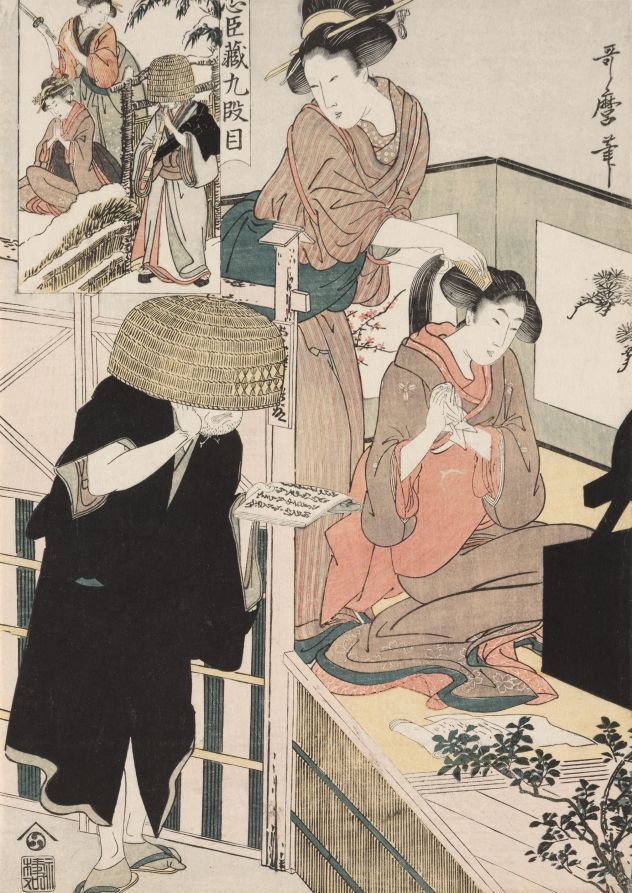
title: Chushingura: Act IX of The Storehouse of Loyalty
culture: Japan, Edo period (1615–1868)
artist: Kitagawa Utamaro (Japanese, c. 1754–1806)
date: late 1790s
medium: color woodblock print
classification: Print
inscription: Aritst's signature: Utamaro hitsu.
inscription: Publisher: Nishimuraya Yohachi (Eiju han, emblem).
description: Stage version: In this dramatic scene depicted in Masayoshi’s stage version (see Chushingura: Perspective Picture for the "Treasure House of Loyalty" [1985.338.9]), Tonase prepares to kill her daughter Tonami with her husband’s sword and then to commit suicide. The dire moment results from the humiliating rejection of her daughter’s marriage contract. Fortunately, her husband, Honzo, dressed as an itinerant Buddhist priest, appears just in time to stop the tragedy. Parody print: In the parody print, Utamaro turned this dramatic event into a scene of domesticity in which the mother brushes her daughter’s hair. An itinerant priest, wearing a deep-brimmed basket hat, reads to them from the gate.